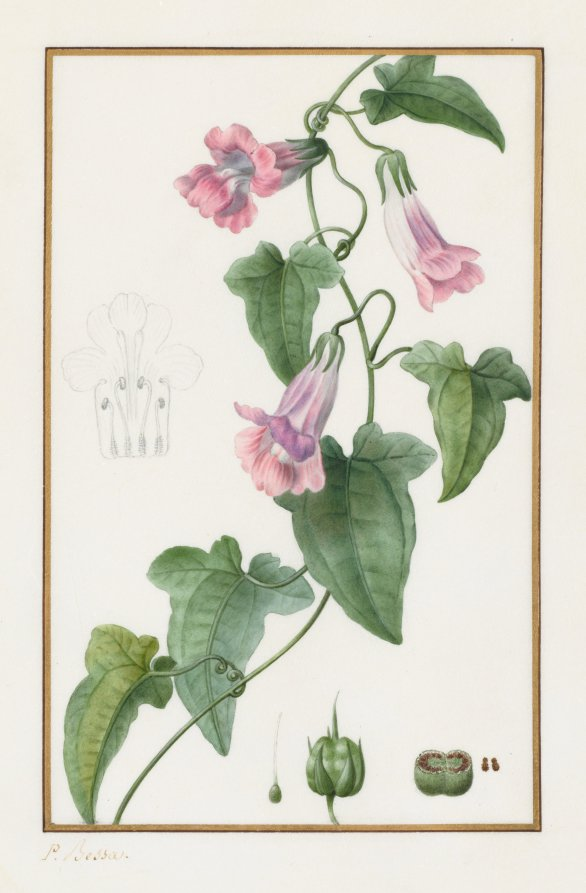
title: (Botanical: Maurándia semperflorens)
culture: France, 19th century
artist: Pancrace Bessa (French, 1772–1846)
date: 1836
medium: pencil and watercolor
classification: Drawing